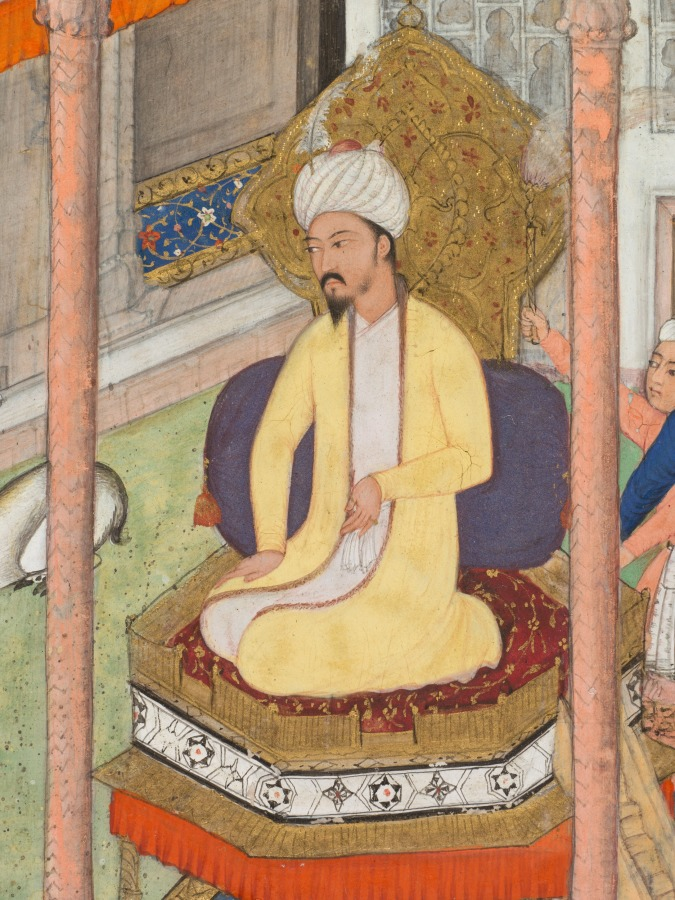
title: Babur receives booty and Humayun’s salute after the victory over Sultan Ibrahim in 1526, from an Akbar-nama (Book of Akbar) of Abu’l Fazl (Indian, 1551–1602)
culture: Mughal India, court of Akbar (reigned 1556–1605)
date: c. 1596–1597 or 1604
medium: Gum tempera and gold on paper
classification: Painting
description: The first Mughal emperor Babur sits enthroned as men bring gifts and sacks of tribute to mark a successful expansion of his territories. Emblematic of his role in leading the victory, his son Humayun wears a wine-and-gold robe of honor despite the Delhi heat in late April. Marking the royal space are a carpet and canopy painted with a lapis lazuli ground. The floral vine motif called arabesque swirls around a central lobed medallion. These delicate patterns are inspired from Persian manuscript illuminations. Contemporary historians describe awnings of gold embroidery, brocade, and velvet along with colorful carpets resembling a beautiful flower bed.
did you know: A clerk records the amount of tribute that Babur received from conquered kings.